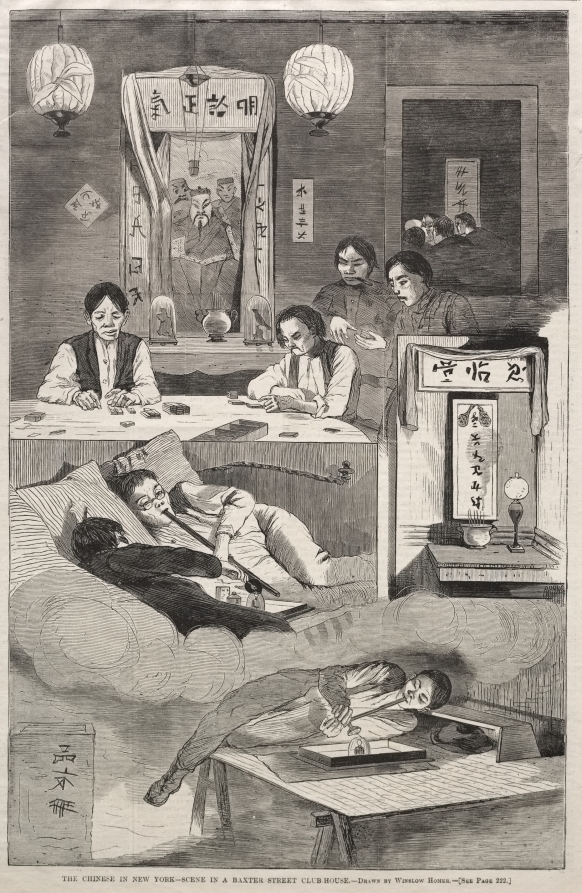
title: The Chinese in New York - Scene in a Baxter Street Club-House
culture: America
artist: Winslow Homer (American, 1836–1910)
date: 1874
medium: wood engraving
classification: Print